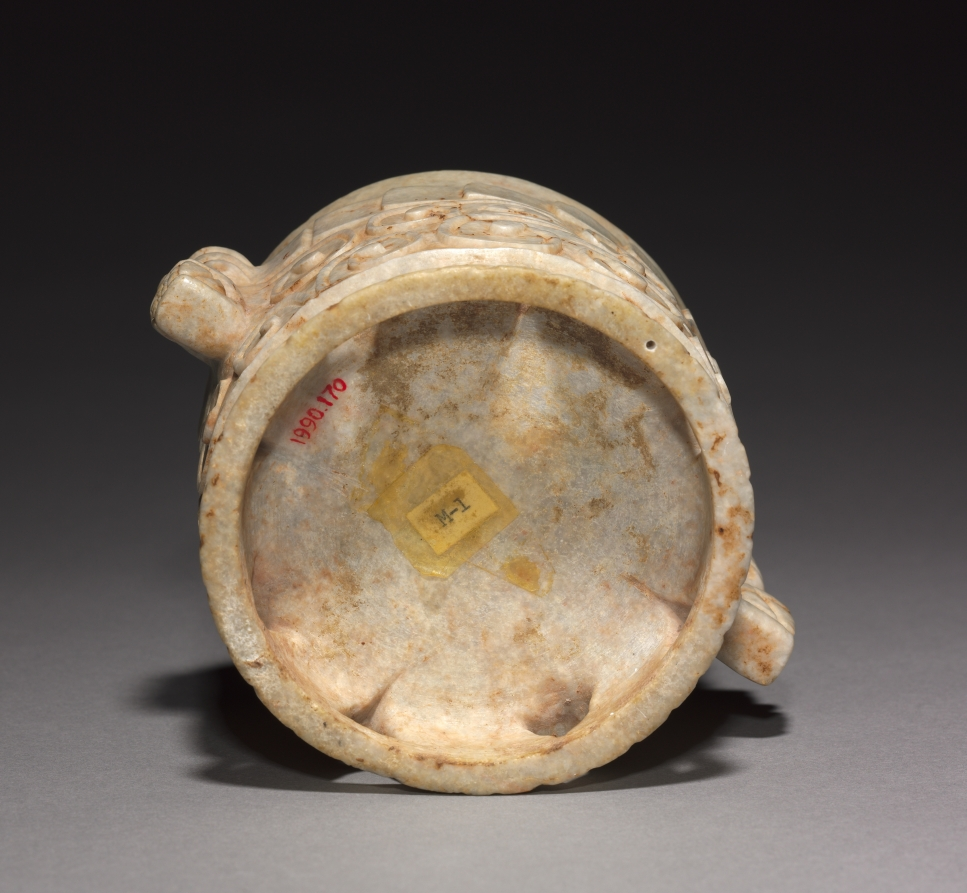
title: Ring-Base Vessel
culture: Honduras, Maya, Ulúa Valley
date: c. 600–1000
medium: marble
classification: Sculpture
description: The Ulúa region of Honduras, to the east of Maya territory, is best known for white marble vessels with walls ornamented in low relief and handles carved as animal heads, here bats but also felines, birds, monkeys, and others. This small example is distinguished by the crispness of its carved scrolls and the triangular cutouts of its pedestal base.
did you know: One of two vessels that were the first ancient American artworks collected by James and Florence Gruener.